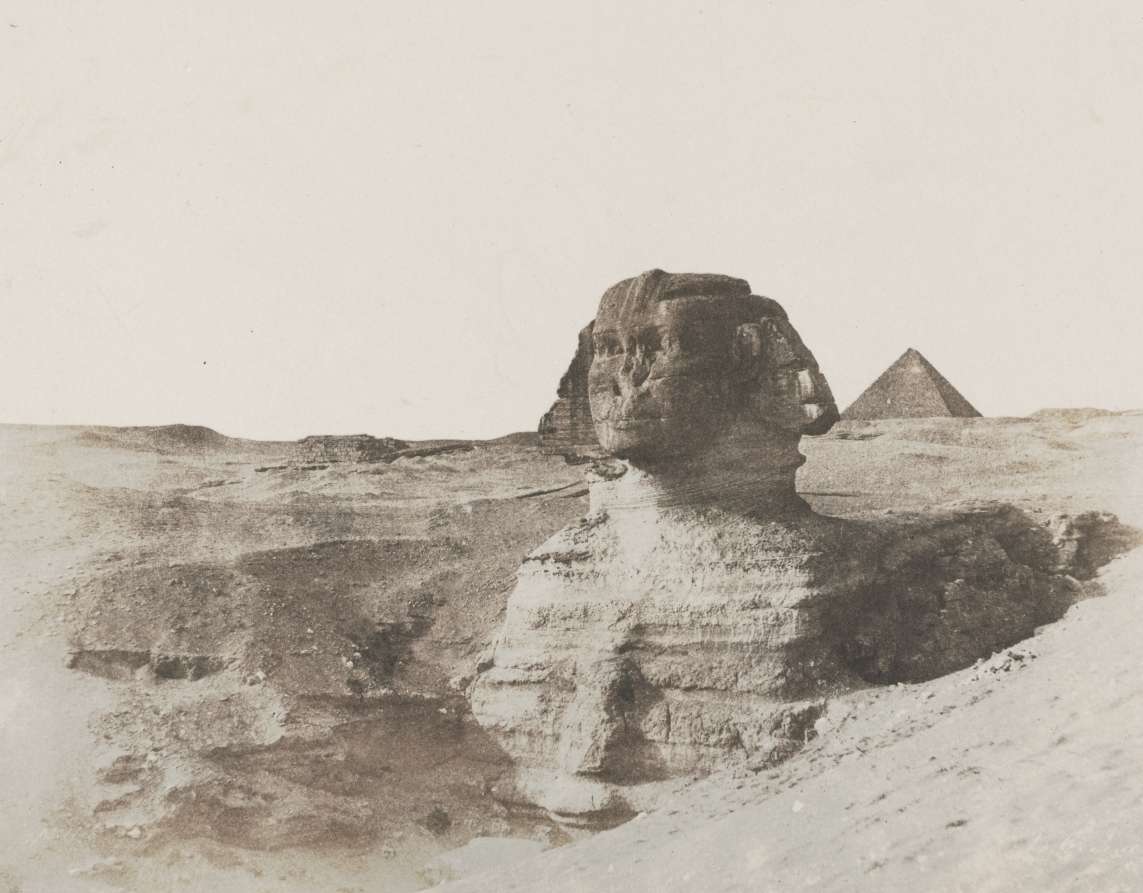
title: The Sphinx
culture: America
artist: John Beasley Greene (American, 1832–1856)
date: c. 1853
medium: salted paper print from waxed paper negative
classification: Photograph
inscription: mprinted in lower left of image: "M: 46" Imprinted in lower right of image: "John Beasley Greene" Written in pencil on recto of mount: "75" Written in pencil on recto of mount: "M-46" Written in pencil on verso of mount: "YE1356" Written in pencil on lower right (then erased): "J" Imprinted on verso: "e" with the remaining inscription removed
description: The son of a wealthy banker, Greene was an American but born and raised in Paris. At a young age, he became an avid archaeologist focusing on the Middle East. Before embarking on his first trip to Egypt in 1853 at age 19, he learned photography so he could accurately document excavations, discoveries, and inscriptions, but he also used the relatively new medium to produce elegant landscapes such as the view of Thebes nearby. Greene, who was involved in excavations of the Great Sphinx, died in Cairo in 1856, possibly of tuberculosis.